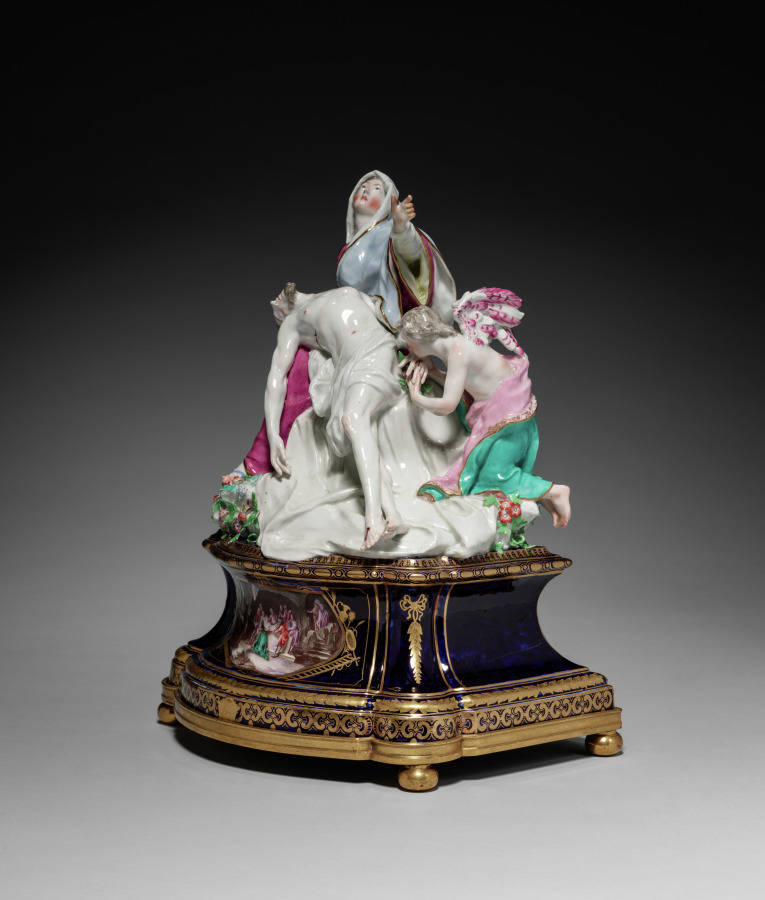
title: Figure of the Pietà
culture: England, London, Chelsea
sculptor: Joseph Willems (Flemish, 1715–1766)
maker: Chelsea Porcelain Factory (Britain, London, 1745–84)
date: c. 1761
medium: Soft-paste porcelain, painted in enamels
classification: Ceramic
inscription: Painted in gilt over the glaze at base of figure on the reverse: [a gold anchor]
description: The distinctively Roman Catholic subject of Mary cradling her son, the crucified Christ, suggests this figure was probably made for one of the aristocratic English families forced to practice their Catholicism in secret during the mid-1700s. Because of the laws banning Catholic worship in England, grand houses were often modified to include private chapels or rooms in private quarters where visiting priests delivered the sacraments in defiance of the laws favoring Protestant worship. A figure of this size and type likely would have served as an important devotional focal point within that context.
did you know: Only three examples of this figure by the Chelsea Porcelain Factory are known to exist.